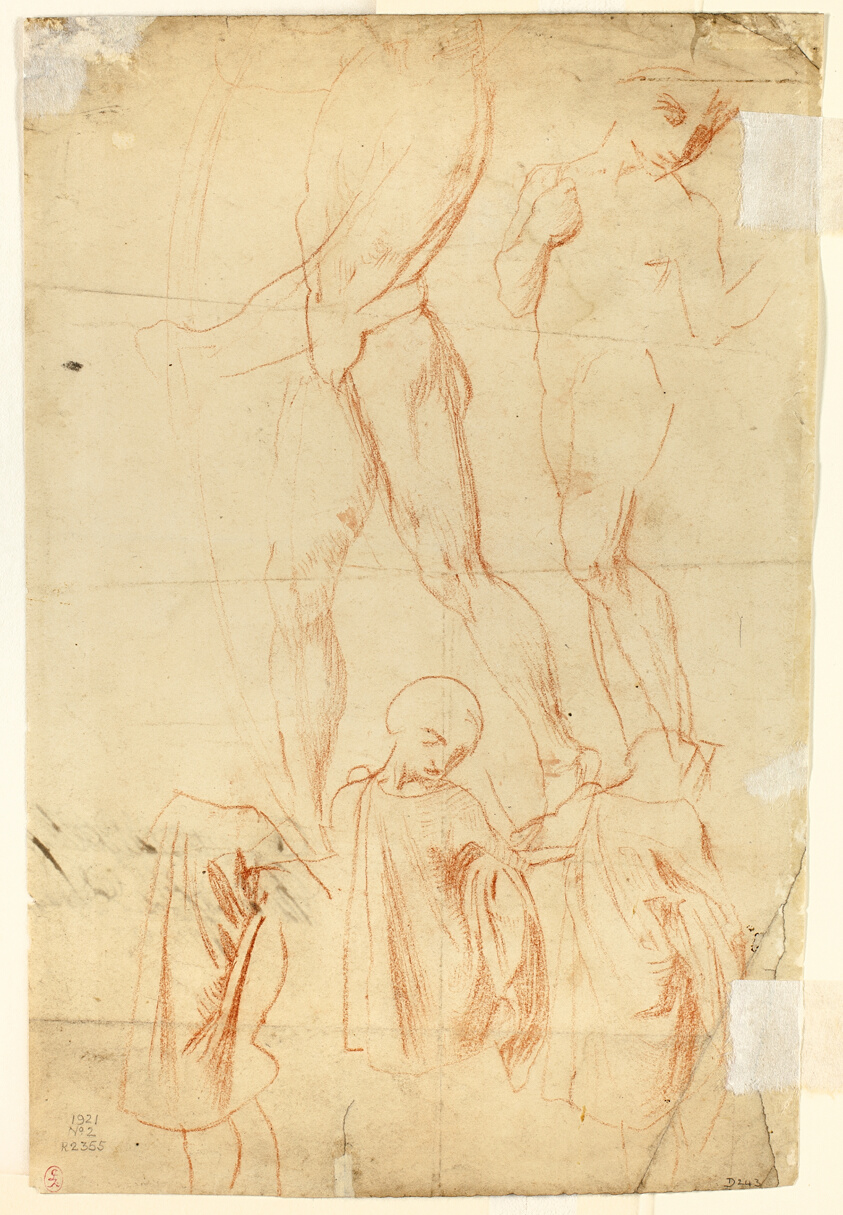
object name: Drawing and Watercolor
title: Woman with Book (recto); Sketches of Male Figure (verso)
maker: Attributed to Alfred George Stevens; English, c. 1817-1875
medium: Red chalk (recto and verso) on tan wove paper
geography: England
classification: chalk; drawings (visual works); prints and drawing; paper